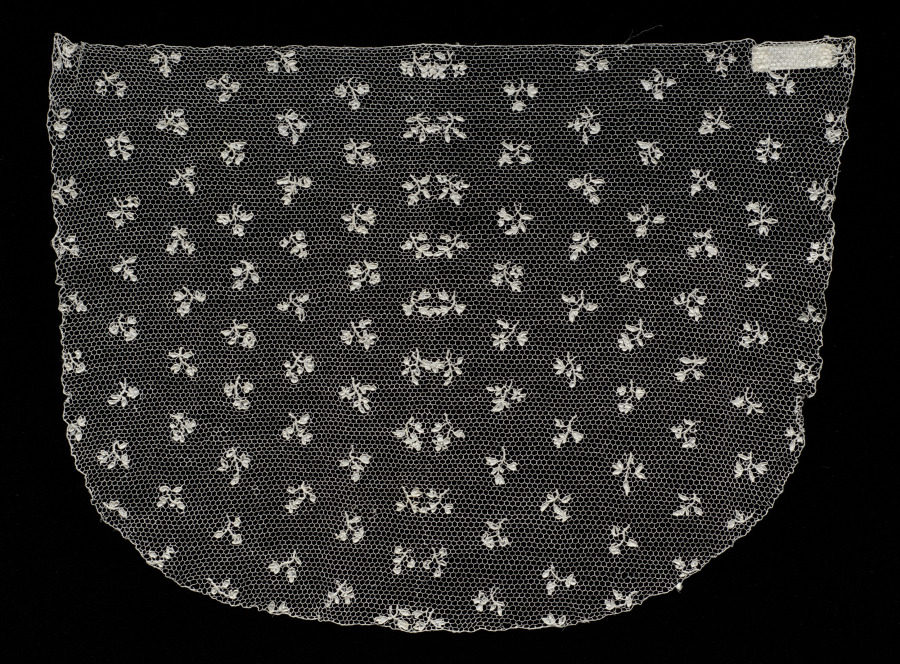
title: Lace Cap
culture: France, Argentan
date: 1760–99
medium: Needle lace (Argentan)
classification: Lace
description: The pattern seen in this lace is Louis 16th style, with small sprigs of flowers scattered over a net ground.